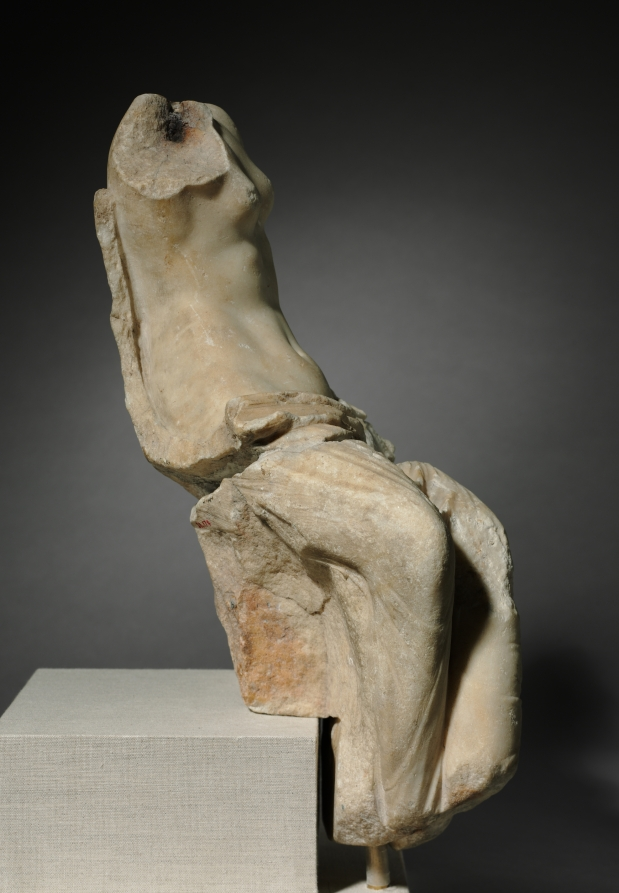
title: Seated Figure of a Woman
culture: Italy, Roman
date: 1–200 CE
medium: marble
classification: Sculpture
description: Although the original subject of this ancient Roman statue fragment is unknown, the cut stone at the back of its base indicates that the statue rested on a ledge, probably incorporated into a larger sculptural group. The nude upper body and relaxed pose suggest an alluring mythical woman, like Venus or a nymph, a beautiful female spirit that embodies elements of nature such as water, woods, or mountains.